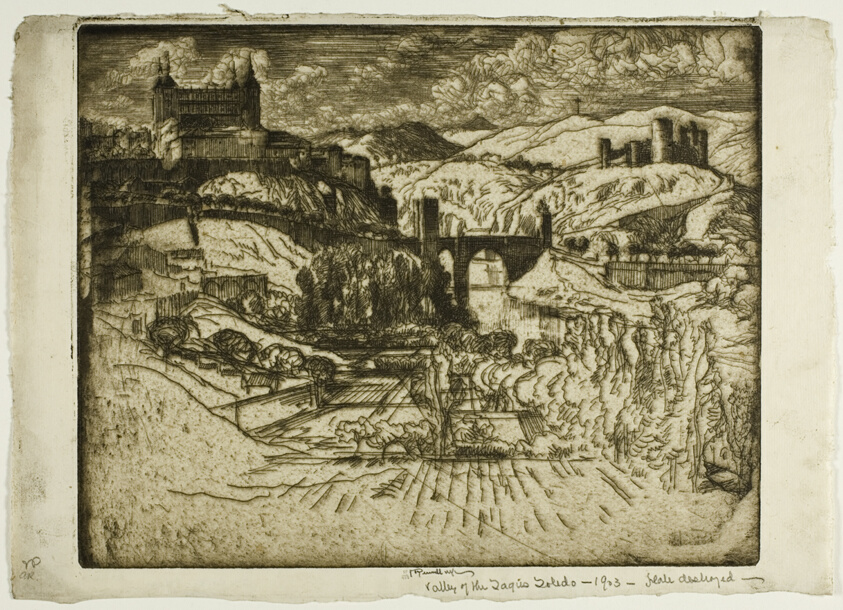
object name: Print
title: The Castles, Toledo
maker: Joseph Pennell (American, 1857-1926)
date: 1904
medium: Etching on ivory laid paper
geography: United States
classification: etching; prints and drawing; print